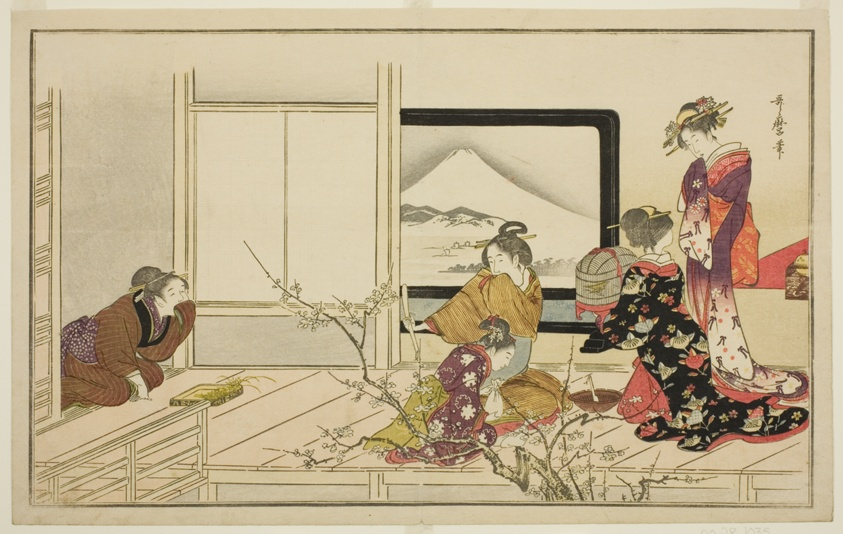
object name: Print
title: Preparing Food for a Nightingale, from the illustrated kyoka anthology "Men's Stamping Dance (Otoko toka)"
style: Japanese (culture or style)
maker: Kitagawa Utamaro 喜多川 歌麿; Japanese, 1753 (?)-1806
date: 1798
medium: Color woodblock print; double-page illustration from book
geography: Japan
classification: woodblock print; print; asian art